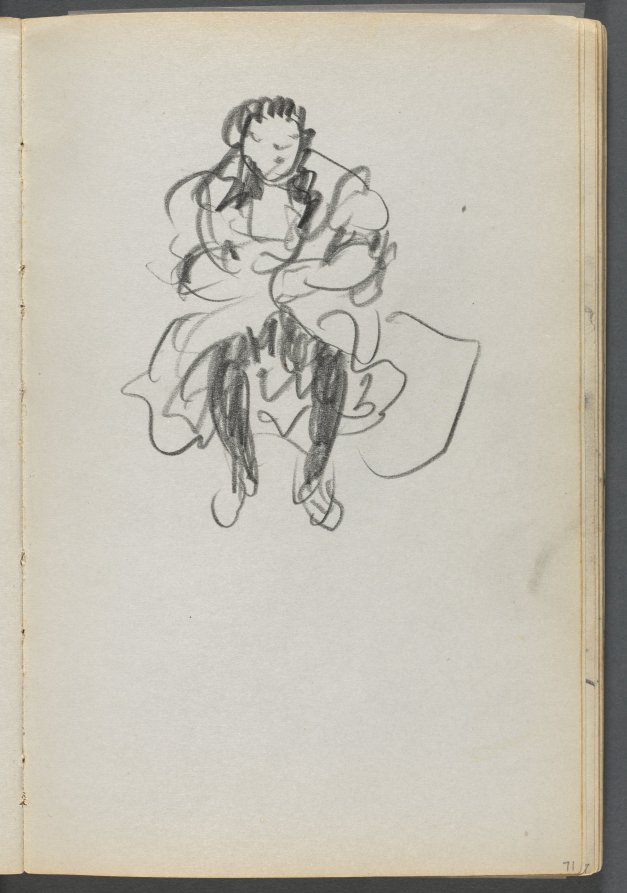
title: Sketchbook, The Dells, N° 127, page 071: Seated Figure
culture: America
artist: Maurice Prendergast (American, born Newfoundland [now Canada], 1858–1924)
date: c. 1919–1921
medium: graphite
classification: Bound Volume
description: This sketchbook contains 59 pages of graphite drawings and 16 watercolors made at various locations on Cape Ann, Massachusetts.